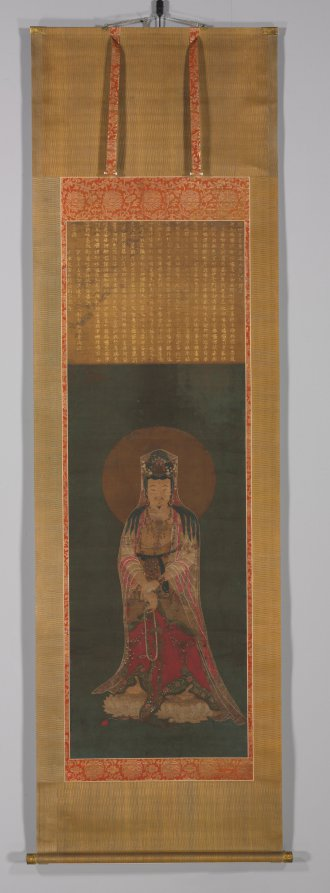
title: Kannon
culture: Japan, Meiji period (1868–1912)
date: c. 1868–1912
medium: hanging scroll; ink and color on silk; inscription in gold ink on silk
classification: Painting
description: The bodhisattva Avalokiteshvara (Kannon in Japanese) stands with each of his feet upon a lotus blossom. The Buddha Amitabha (Amida in Japanese) appears in his headdress. The text written in golden characters attached to the top of the painting is a portion of a religious text extolling the virtues of the bodhisattva. The painter was inspired by Buddhist paintings of the Korean Goreyo period (918–1392); he attempted to reproduce the diaphanous shawl sometimes seen in such early works.